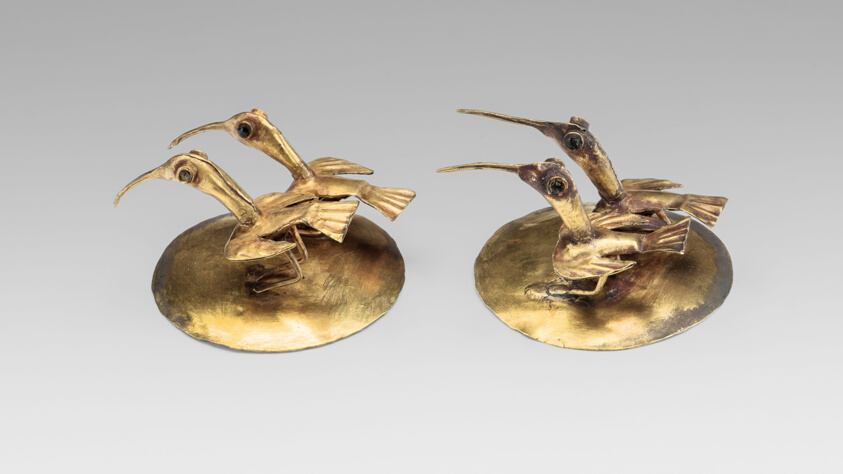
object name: Costume and Accessories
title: Ear Ornaments with Ibis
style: inca, americas, andes, Arts of the Americas, andean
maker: Inca (Ica Valley, south coast, Peru)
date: 1200–1450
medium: Gold with garnet inlay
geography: Ica Valley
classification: ear ornament; gold; jewelry; art of the americas; costume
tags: birds, animals